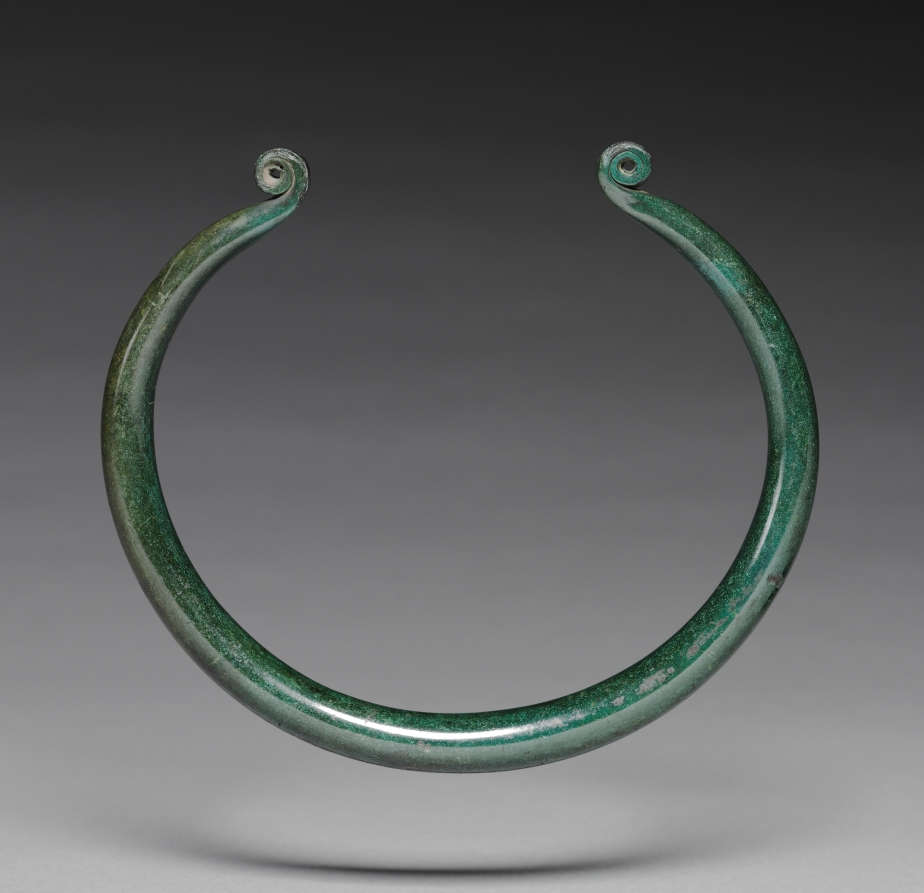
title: Ingot Torque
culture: Hungary, Bronze Age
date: c. 1500 BCE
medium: bronze, wrought bronze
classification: Metalwork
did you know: A torque is a neck ornament usually made of metal.